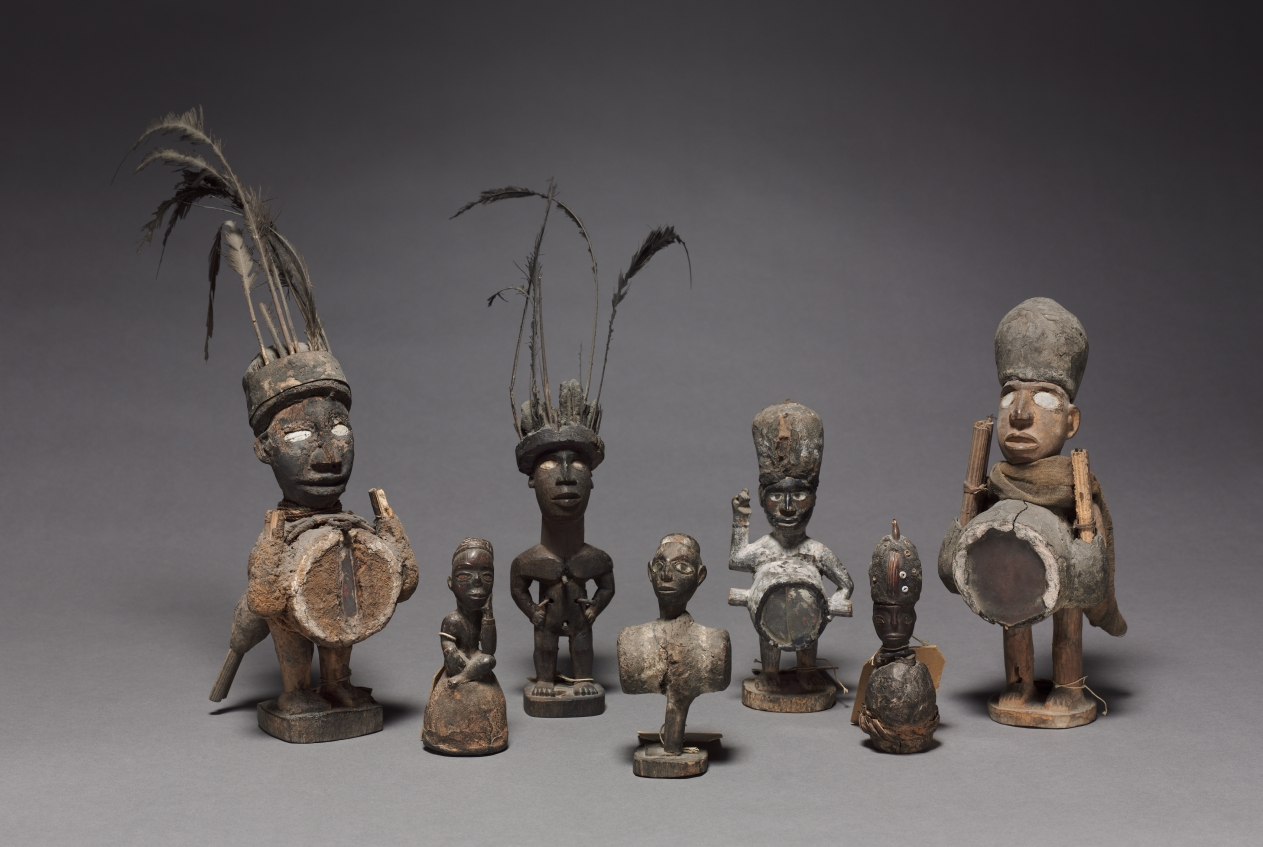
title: Power figure (nkisi)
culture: Africa, Central Africa, Republic of the Congo, Kongo-style maker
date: late 1800s-early 1900s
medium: Wood, metalized glass, organic materials (including resin), feathers, plant fibers, iron, and copper alloy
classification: Sculpture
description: One of seven minkisi figures previously in the René and Odette Delenne collection, this object contained medicines in which an ancestral spirit was believed to reside. This figure is one of the two tallest in the collection. Feathers of a bird of prey adorn its head, with two small guns pointing upward and a third hanging down. It had belonged to “the sorcerer of Louboulou.”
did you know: This is one of two tallest in the collection of spiritual figurines loaded with gunpowder to shoot at witches: nduda, or “night guns.”